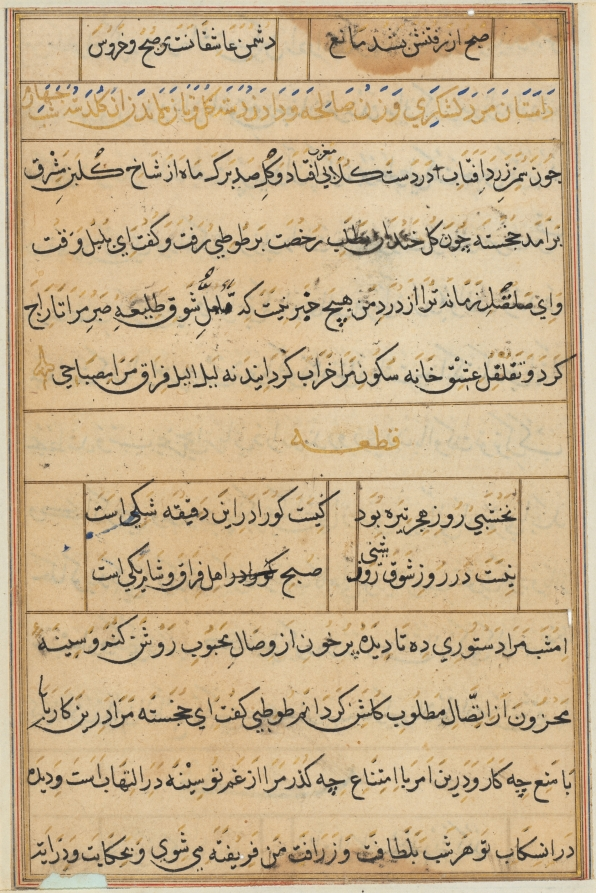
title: Page from Tales of a Parrot (Tuti-nama): text page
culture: Mughal India, court of Akbar (reigned 1556–1605)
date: c. 1560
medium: gum tempera, ink, and gold on paper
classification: Painting